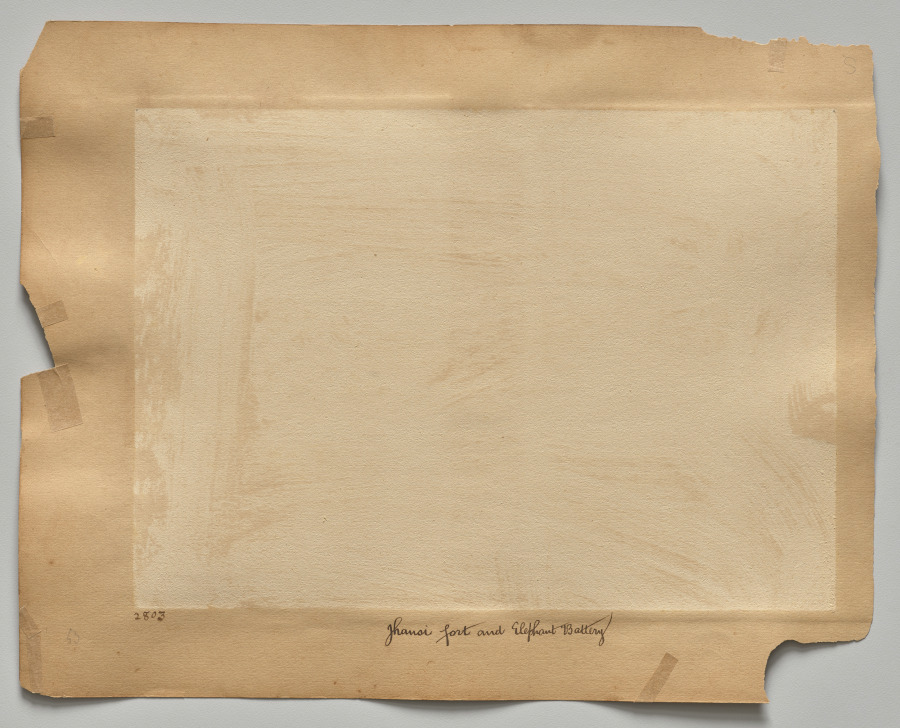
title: Ramkishore Singh, Rewa (recto, top); Mowhri Rahman Alli Khan family, Rewa (recto, bottom)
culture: India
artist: Raja Deen Dayal (Indian, 1844–1905)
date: c. 1882–87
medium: albumen print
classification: Photograph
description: These photographs are part of an album, now disassembled, of around 105 photographs taken in India between 1885 and summer 1887 that provide glimpses into the lives of the British colonial elite and royal and upper-class Indians. The museum holds another group of 37 pictures from this album (2016.266), which was probably commissioned by a British civil servant visiting or working in India around 1888 as a personal souvenir of his experiences there.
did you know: Raja Deen Dayal is regarded now, and was considered during his lifetime, to be India’s most important 19th-century photographer.